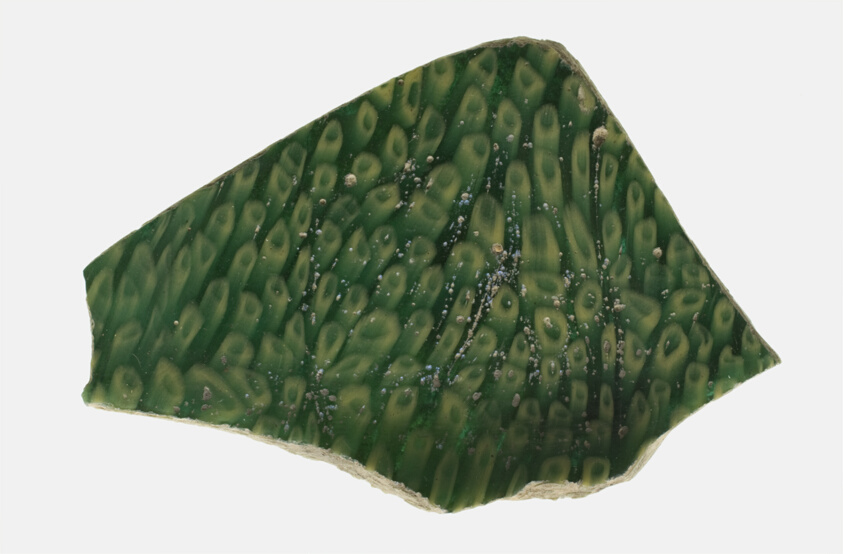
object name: Decorative Arts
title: Fragment of a Bowl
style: roman (ancient, style or period), ancient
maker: Roman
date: 1st century BCE–1st century CE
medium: Glass, mosaic glass technique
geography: Italy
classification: fragment; decorative arts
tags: decoration